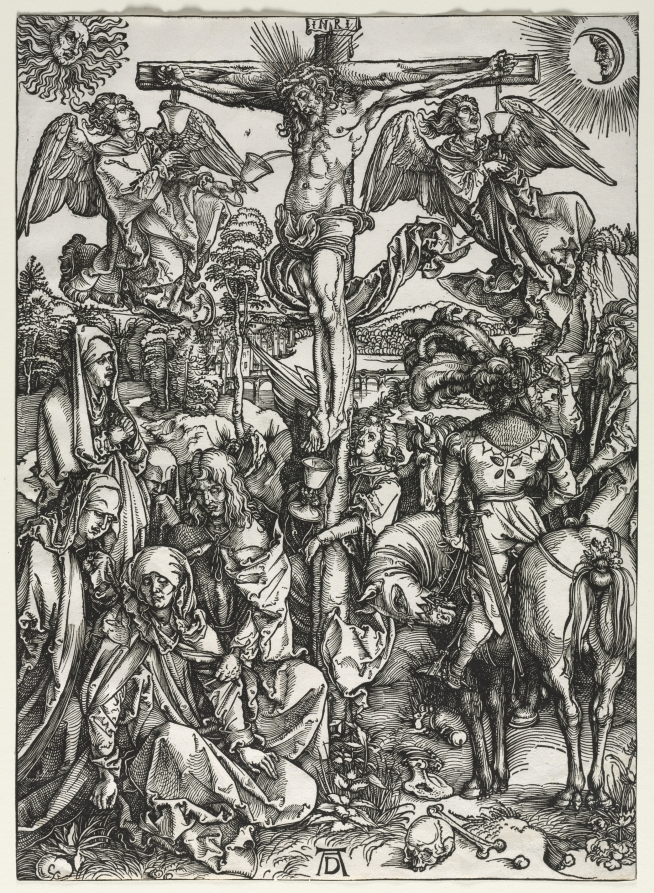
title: The Crucifixion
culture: Germany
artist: Albrecht Dürer (German, 1471–1528)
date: 1497–98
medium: woodcut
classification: Print